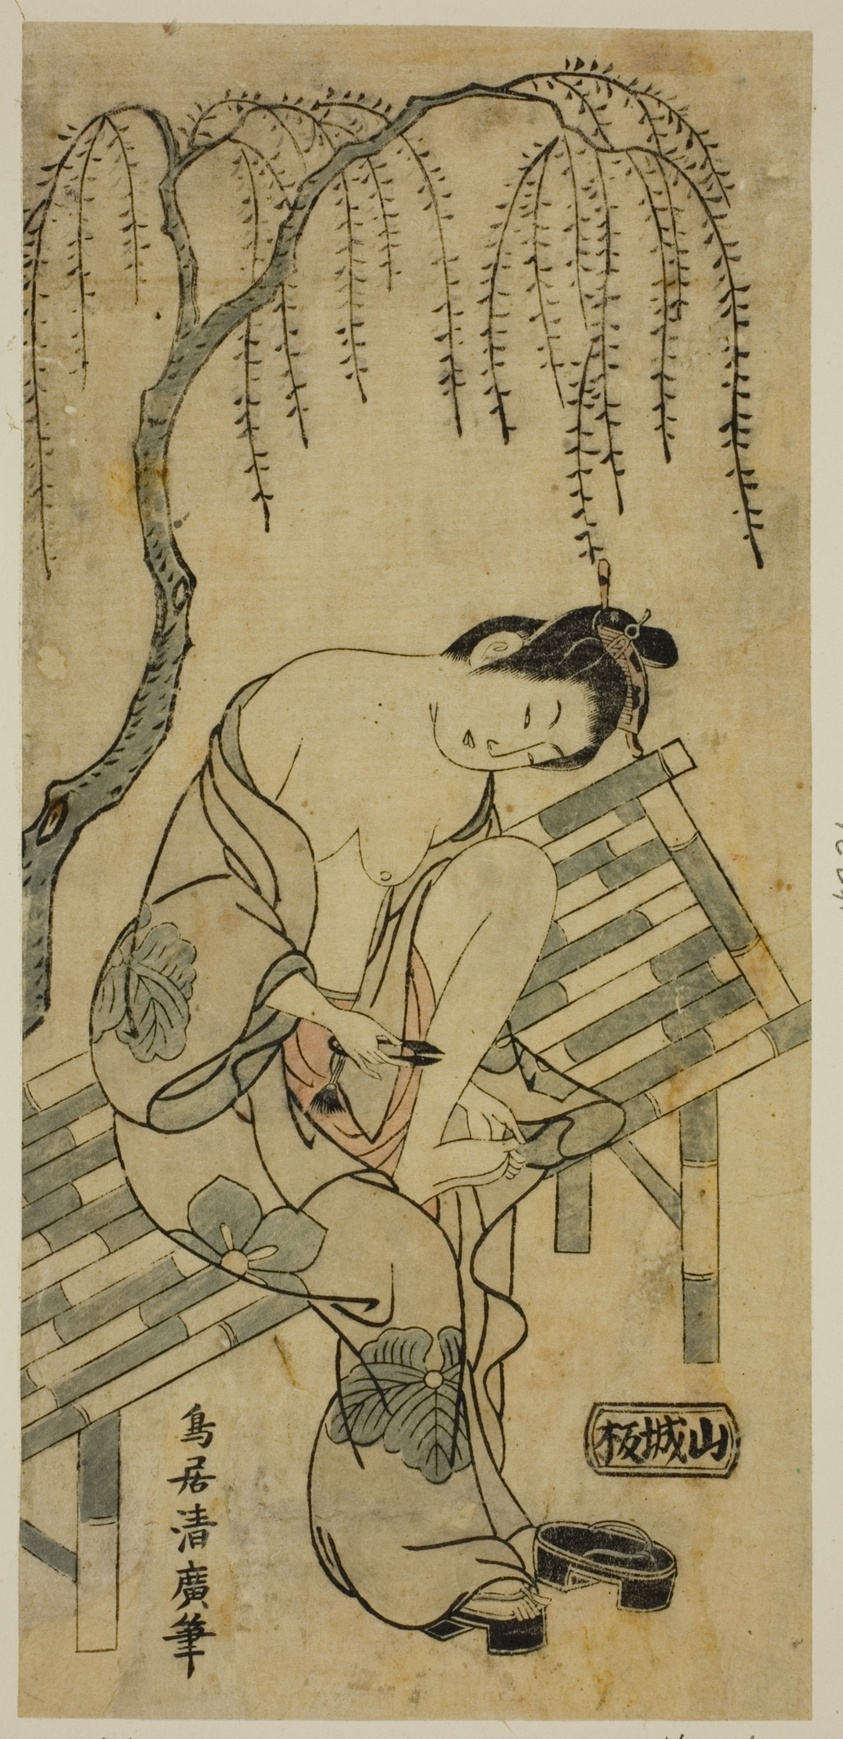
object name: Print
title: Trimming Her Nails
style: Japanese (culture or style)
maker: Torii Kiyohiro (Japanese, active c. 1737-76)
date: c. 1755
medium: Color woodblock print; hosoban, benizuri-e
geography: Japan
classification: woodblock print; print; asian art